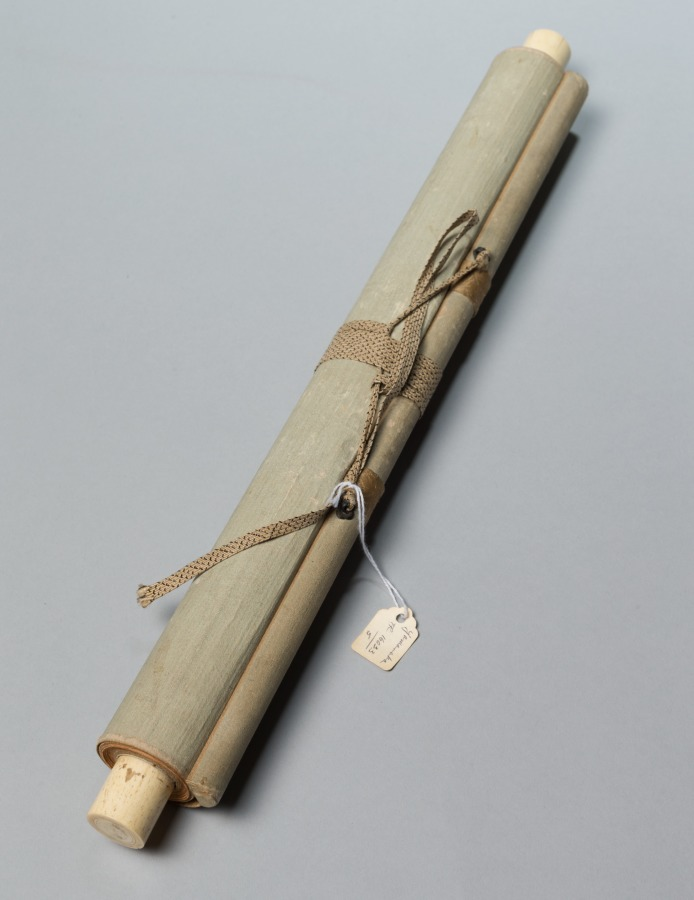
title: White-Robed Guanyin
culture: China, Yuan dynasty (1271-1368)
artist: copy after Jueji Yongzhong (Chinese, active around 1300)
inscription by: Zhongfeng Mingben (Chinese, 1263–1323)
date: late 1200s–early 1300s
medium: hanging scroll; ink and gold on silk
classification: Painting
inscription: Inscription: one of the 84,000 painted by the priest Insei.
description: The original model for this ink drawing of Guanyin, the bodhisattva of infinite compassion (Avalokiteshvara in Sanskrit), is CMA 1978.47.1. This drawing is a later copy with the same image of the White-Robed Guanyin, but in reverse. The inscription above reads: one of the 84,000 painted by the priest Insei. The inscription seems to indicate that the Japanese priest Insei repeatedly copied the image of the bodhisattva in an act of piety and to accumulate merit, as is promised in the Lotus Sutra for anyone who paints images of the Buddha, they “will achieve the Buddha path.” The priest’s name and seal need further study and identification.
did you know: The bodhisattva's face and halo were delicately painted in gold.